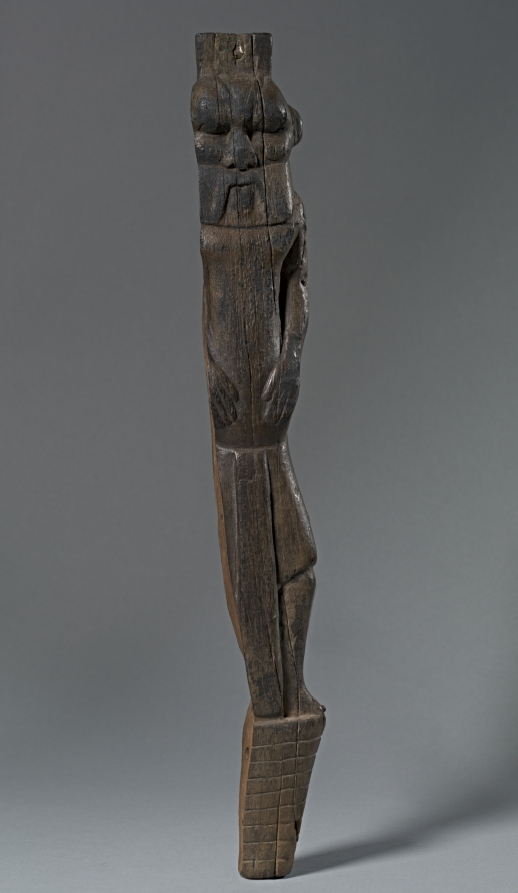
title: Chair or Bed Leg with the God Bes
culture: Egypt, New Kingdom (1540–1069 BCE), Dynasty 18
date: 1540–1296 BCE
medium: tamarisk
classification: Furniture and woodwork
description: The genial god Bes appears here in the form of a furniture leg. With hands on his pot belly and wearing a short kilt with a long apron, he stands bowlegged on a truncated cone base. He has long, upward sweeping, diagonal eyebrows, large eyes, full cheeks, and rounded ears, and he wears a full beard and mustache. His body is soft and unmuscular. As a household god, Bes figured prominently as a decorative motif both in royal and private dwellings.